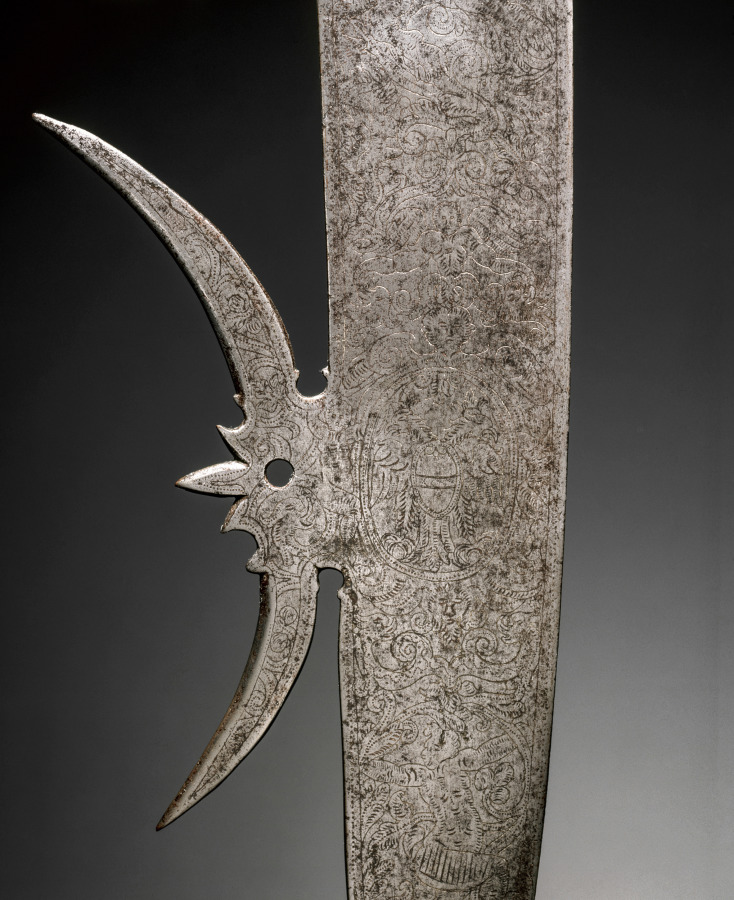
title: Glaive (with Arms of Giustini Family)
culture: Italy, Venice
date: c. 1600–1620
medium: steel, etched; wood haft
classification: Arms and Armor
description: A glaive is a long staff weapon with a large cleaver or knife-like blade. The flat steel blade is conducive to ornamental decoration such as heraldic devices. The decorative nature of this weapon made it a favorite for ceremonial use.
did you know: The large number of surviving glaives that are decorated with the arms of Venetian families indicate its popularity in the city of Venice.